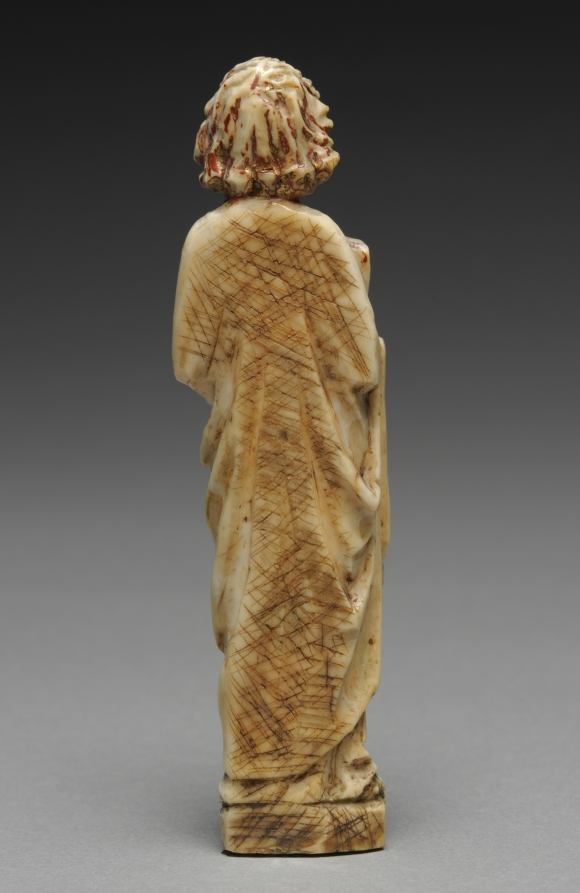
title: Saint John the Evangelist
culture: Germany or Moravia, 14th century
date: c. 1325–1330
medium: ivory with traces of paint and gilding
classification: Ivory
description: This figure with a Virgin and Crucified Christ (now lost) formed a Crucifixion group within a shrine.